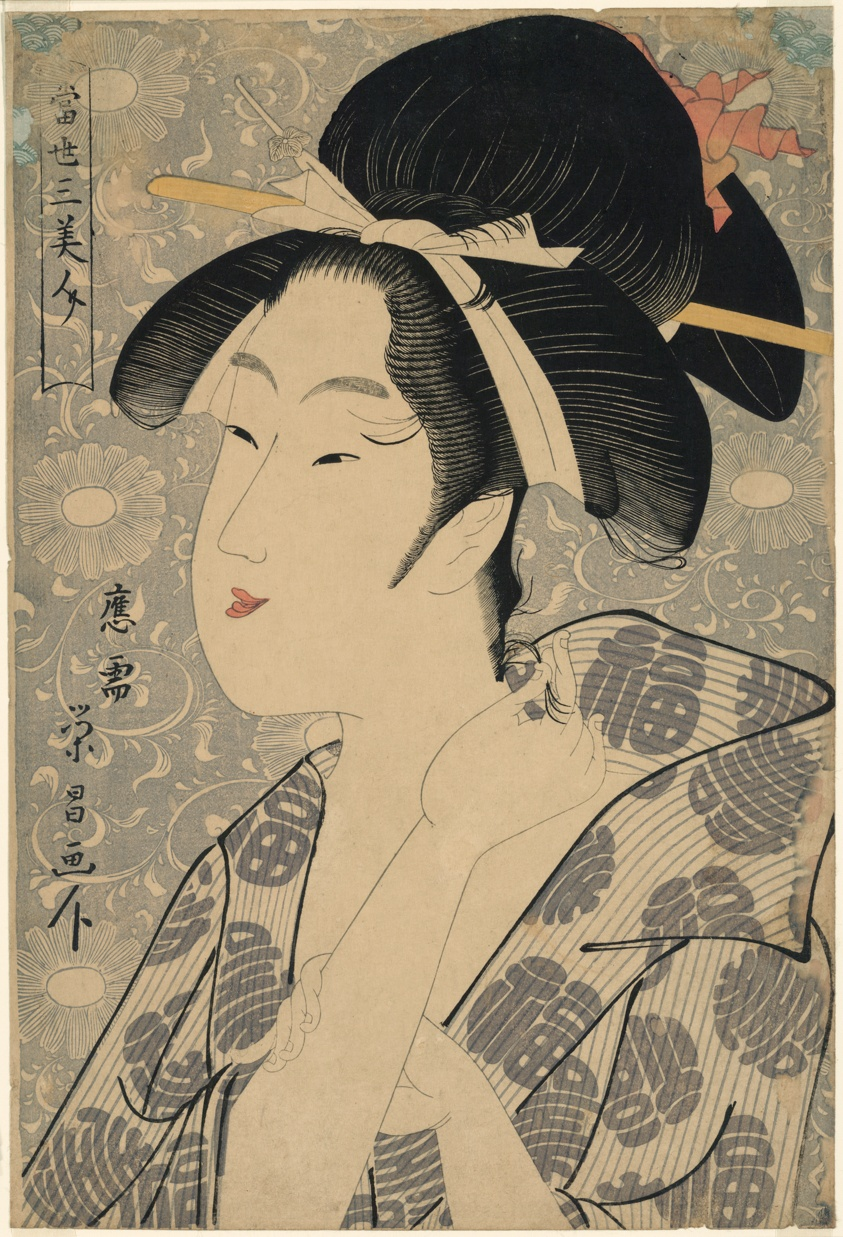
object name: Print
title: Three Beauties of Our Time (Tosei san bijin)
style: Japanese (culture or style)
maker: Chokosai Eisho (Japanese, active 1780-1800)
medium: Color woodblock print; oban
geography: Japan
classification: woodblock print; print; asian art